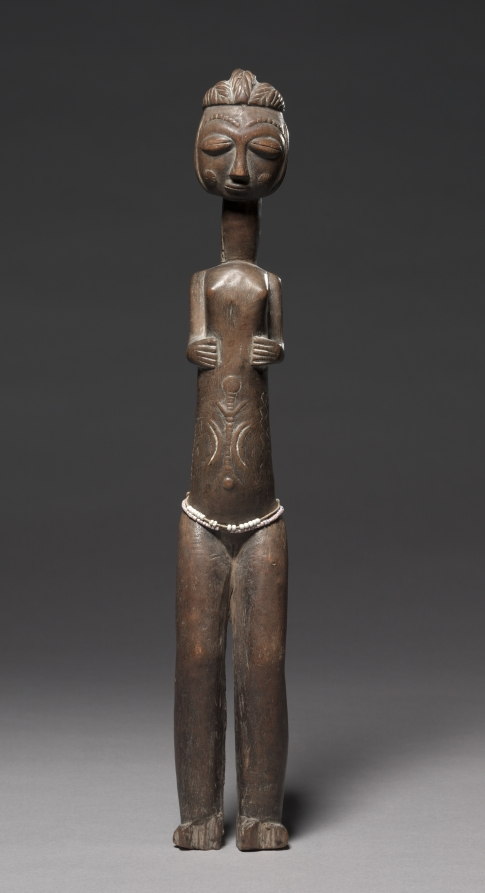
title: Female Figure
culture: Africa, West Africa, Côte d'Ivoire, possibly Bondoukou region, unknown maker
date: late 1800s–early 1900s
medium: Wood, paint, glass beads, and natural fiber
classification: Sculpture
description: An artistic melting pot, the Bondoukou region in northeastern Côte d’Ivoire near the border with Ghana is inhabited by several ethnic groups whose cultures and artistic styles often intermingle. This figure’s rounded shapes and delicate surface decoration––which seem to imitate body scarifications––closely resemble the style of Baule carvings. The figure’s meaning and function remain a mystery.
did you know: Artworks from different regions traveled across Africa; while found in Wenchi, Ghana, this figure was made in nearby Côte d'Ivoire.